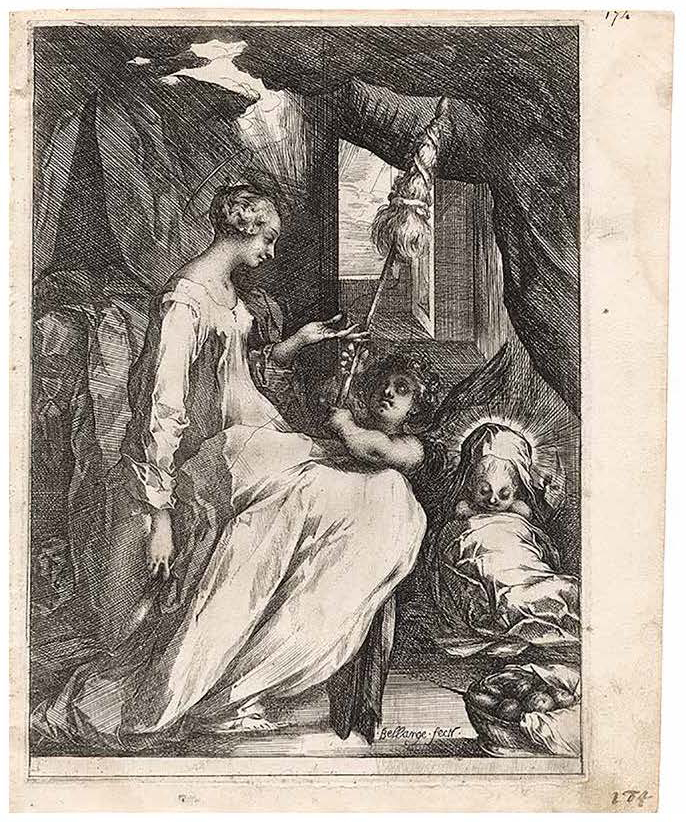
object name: Print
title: The Virgin and Child with Distaff and an Angel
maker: Jacques Bellange (French, c. 1575–1616)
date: c. 1615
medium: Etching in black on ivory laid paper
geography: France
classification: prints and drawing; paper; print; etching